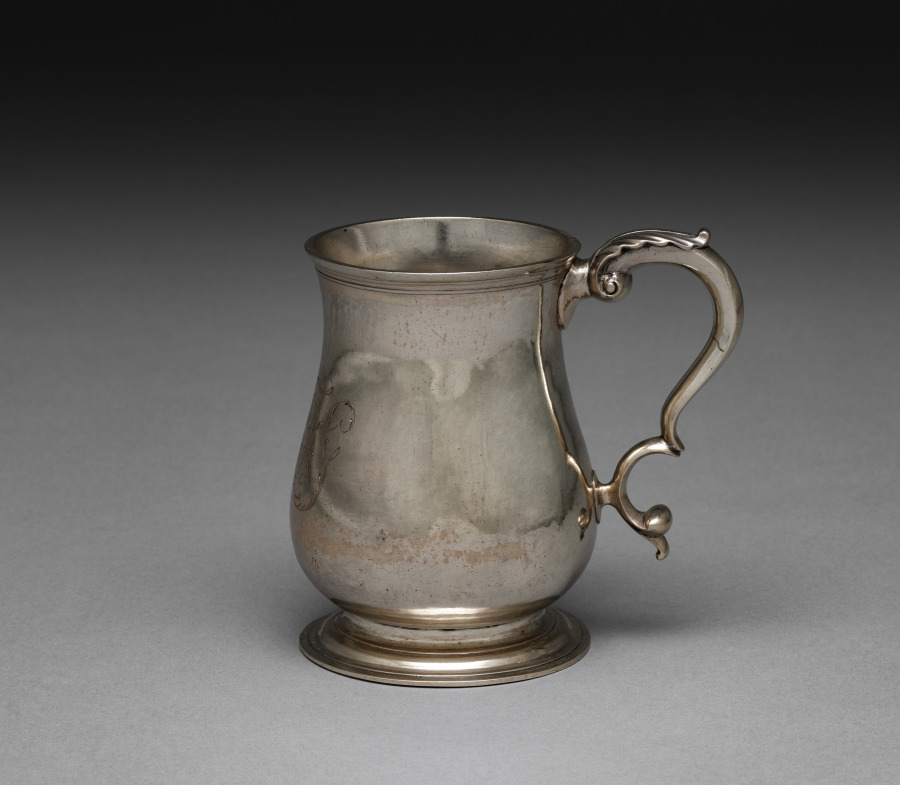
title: Cann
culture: America, Massachusetts, Boston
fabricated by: Zachariah Brigden (American, 1734–1787)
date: c. 1778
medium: silver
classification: Silver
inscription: Engraved on cann opposite handle: "BFG"; engraved underside: "1778"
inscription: Stamped underside: "Z. Brigden"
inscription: Scratched underside: "13-0,9"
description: "Cann" is an old term for a drinking cup with a handle.